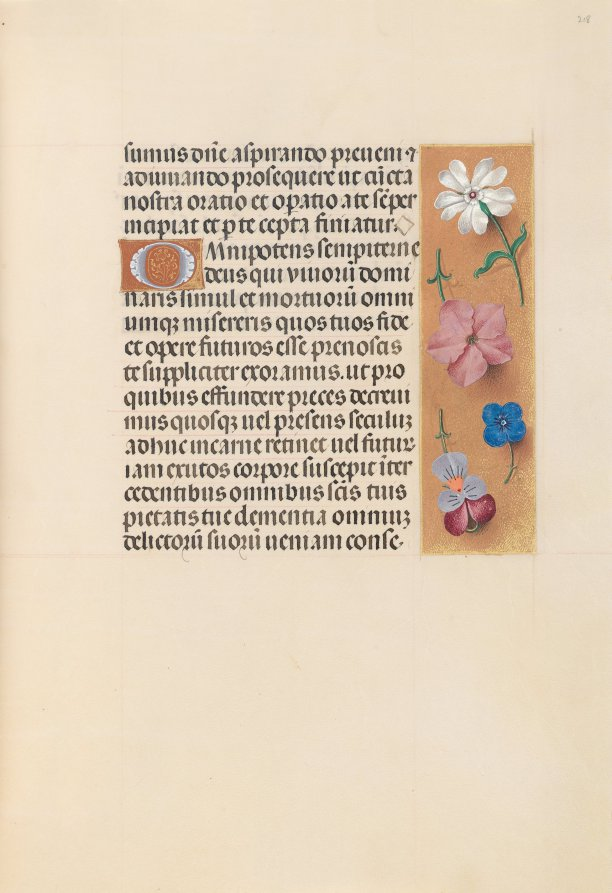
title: Hours of Queen Isabella the Catholic, Queen of Spain: Fol. 218r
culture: Flanders, Ghent and Bruges, late 15th century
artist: Master of the First Prayerbook of Maximillian (Flemish, c. 1444–1519)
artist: and Associates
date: c. 1500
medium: ink, tempera, and gold on vellum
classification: Bound Volume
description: This manuscript was illuminated by a circle of at least five highly organized manuscript painters active in the Flemish cities of Ghent and Bruges. The principal illuminator was Alexander Bening, who painted the majority of the book's miniatures. Manuscripts produced by this circle of artists are renowned for the decoration of their borders, which typically feature a rich variety of realistically-painted flowers, birds, and butterflies. This prayer book, called a book of hours, was intended not for a cleric, but for the private devotions of a lay person-in this case, Isabella the Catholic, Queen of Spain (1451-1504). Isabella's coat of arms embellishes the book's frontispiece. It is unlikely that the book was commissioned by the Queen herself; rather, she probably received it as a diplomatic gift from someone courting her patronage, perhaps Cardinal Francisco Jimenez de Cisneros. A Franciscan friar, Jimenez was dependent upon Isabella for his advancement, first to the post of Queen's confessor in 1492, and then to Archbishop of Toledo in 1495.